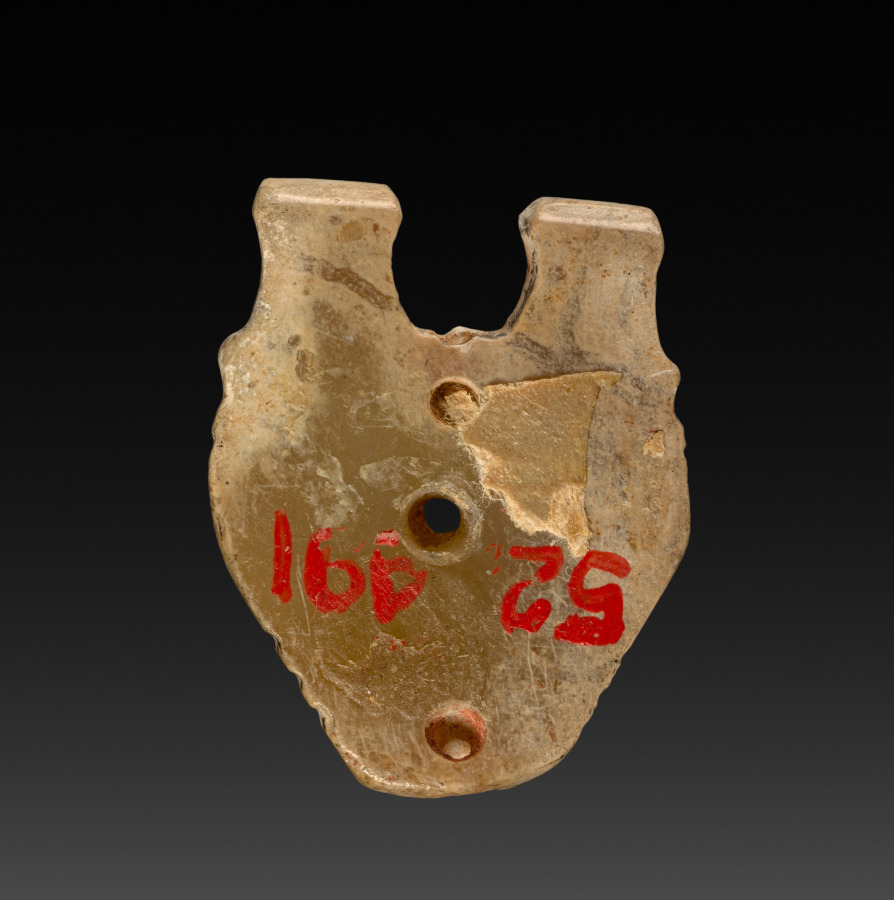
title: Bovine Mask with Capped Horns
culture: China, Shang dynasty (c. 1600–c. 1046 BCE) to Western Zhou dynasty (c. 1046–771 BCE)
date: 1400–1000 BCE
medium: jade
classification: Jade